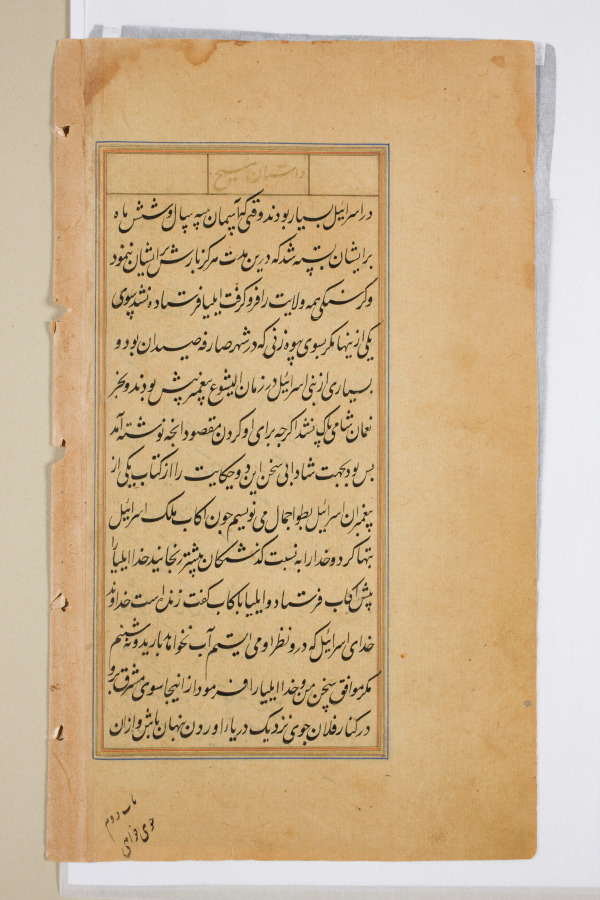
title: Text page from a Mirror of Holiness (Mir’at al-quds) of Father Jerome Xavier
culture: Mughal India, Allahabad, made for Prince Salim (1569–1627)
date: 1602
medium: Ink and gold on paper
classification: Manuscript